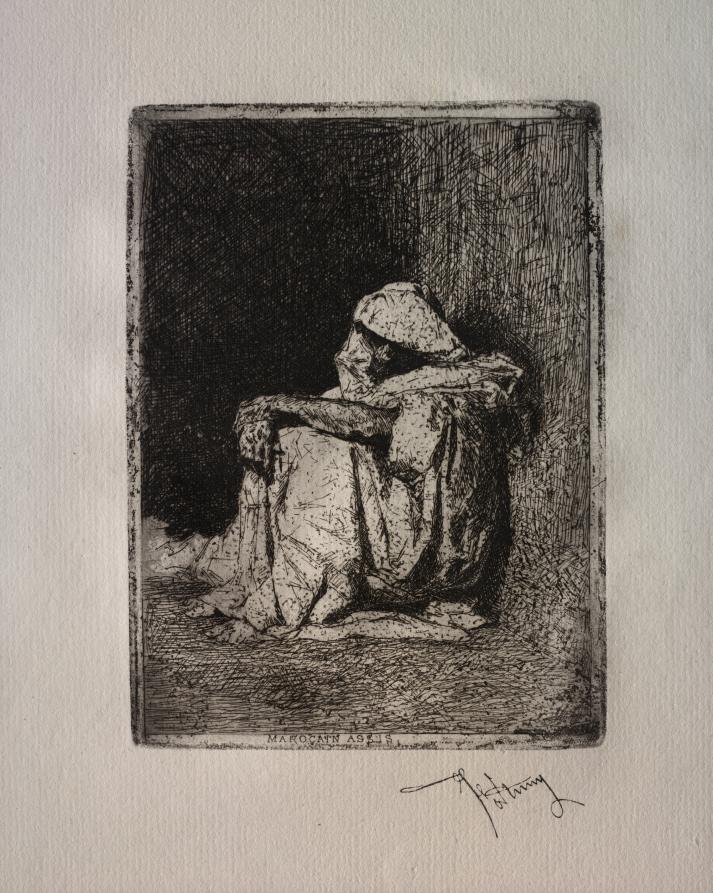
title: Seated Arabian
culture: Spain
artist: Mariano Fortuny (Spanish, 1838–1874)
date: c. 1860–62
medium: etching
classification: Print